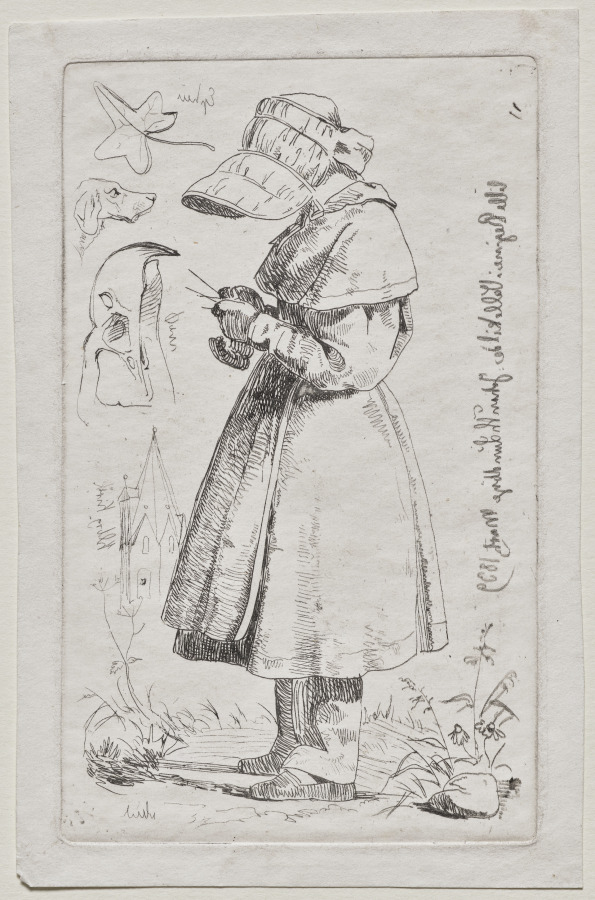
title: Little Regine in Vallekilde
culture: Denmark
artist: Johan Thomas Lundbye (Danish, 1818–1848)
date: 1839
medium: etching on laid paper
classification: Print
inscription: Imprinted in the reverse in image: “Little Regine in Vallekilde Johan Thomas Lundbye 1839”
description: Johan Thomas Lundbye belonged to the youngest generation of artists working during Denmark’s Golden Age, a period of unprecedented creative activity during the first half of the 19th century. An avid painter and draftsman, he simultaneously created more intimate prints such as this one depicting his cousin, Regine. The young girl appears knitting, surrounded by whimsical and anecdotal sketches that play on the experimentality of etching.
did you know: The subject of this print, Johan Thomas Lundbye’s cousin Regine, wore the distinctive bonnet seen here to obscure her face following a childhood accident.